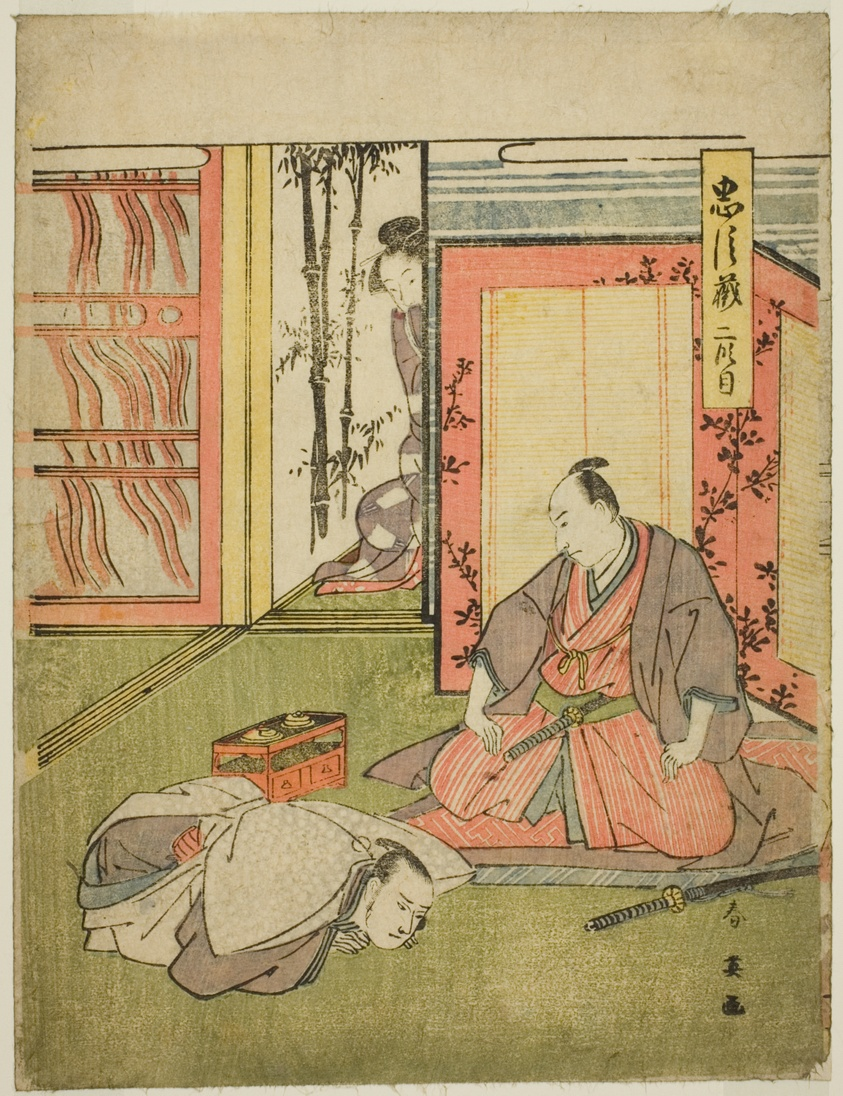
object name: Print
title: Act Two: The Quarters of Momonoi Wakasanosuke from the play Chushingura (Treasury of the Forty-seven Loyal Retainers)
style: Japanese (culture or style)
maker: Katsukawa Shun'ei (Japanese, 1762-1819)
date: c. 1795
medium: Color woodblock print; koban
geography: Japan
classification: woodblock print; print; asian art